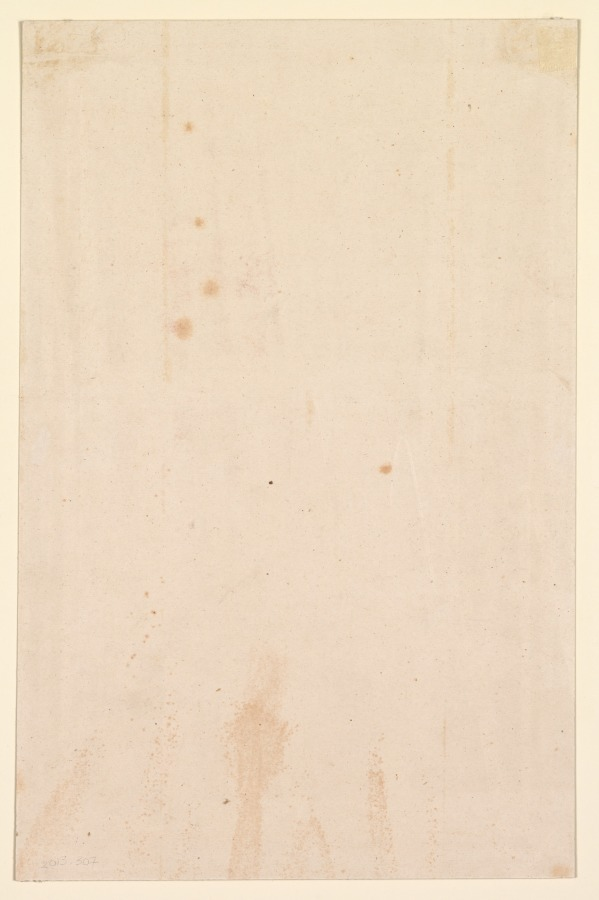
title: A Man Dips His Hand into a Cauldron as Ladies of the Harem Stand in Amazement: A Page from a Manuscript of Religious History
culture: Mughal India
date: c. 1600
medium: Gum tempera and gold on paper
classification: Painting